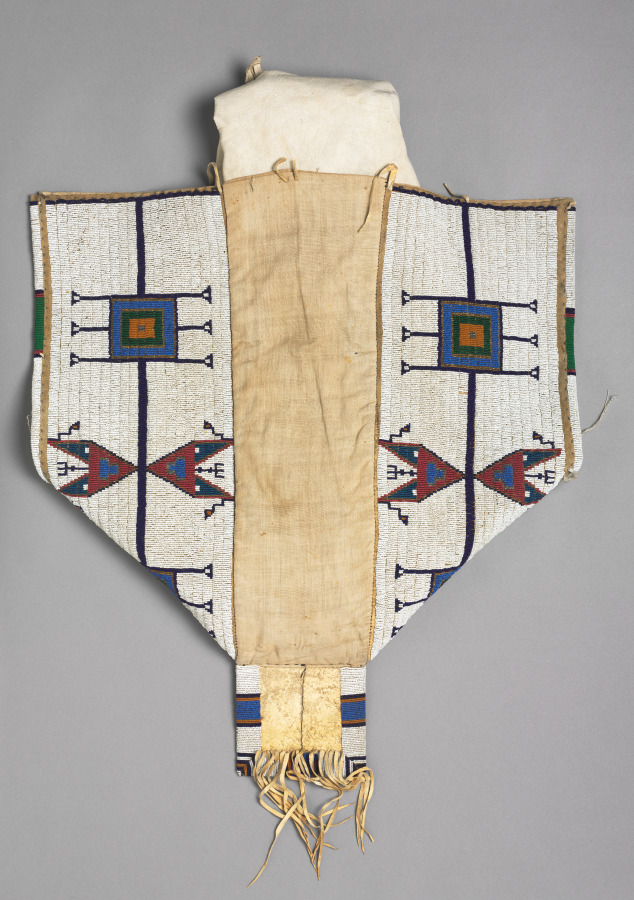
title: Cradle or Baby Carrier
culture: Native North America, Plains, Lakota (Sioux)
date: c. 1900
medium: Native-tanned hide, cotton cloth, glass beads, metal beads, brass bell, sinew thread, cotton thread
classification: Leather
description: Many Plains peoples hold lavishly quilled or beaded cradles in high esteem—they bestow spiritual benefits on the infant and prestige and honor on the family and the maker, usually a female relative. Indeed, today and in the past, creating such a cradle is often regarded as equal to counting coup, the ultimate act of male bravery in which a warrior touches an enemy with a stick known as a coup stick. This cradle was held in the arms; others have wooden frames that can be propped against a support, such as a sofa or a tree, to ease the baby’s socialization into the community.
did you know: In the past, young Plains children spent much of their time in cradles, which remain in occasional use today.